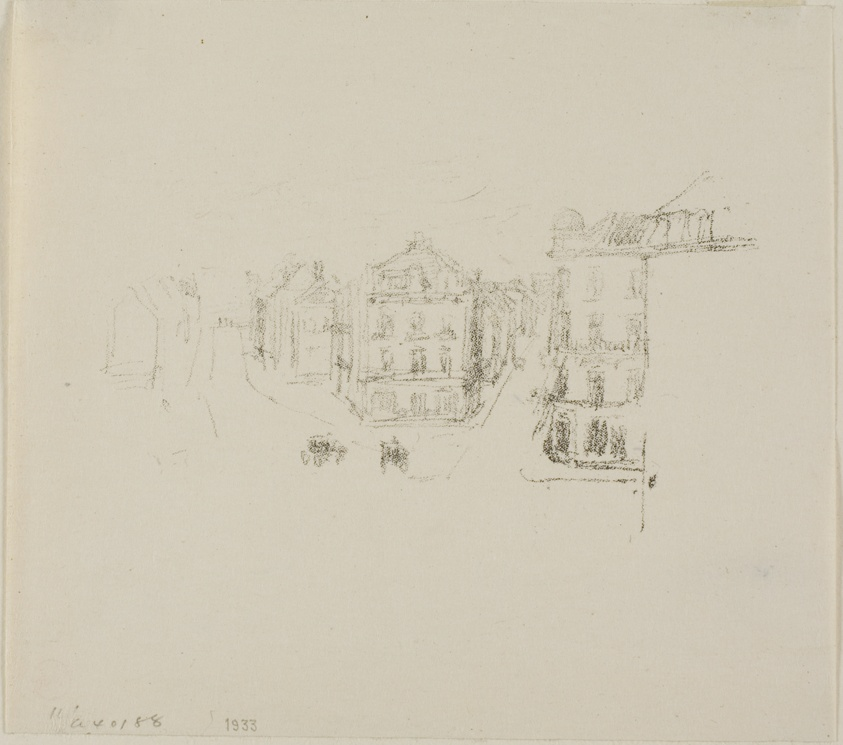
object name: Print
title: Grand Rue, Dieppe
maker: James McNeill Whistler (American, 1834-1903)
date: c. 1891, printed 1904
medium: Transfer lithograph in black on ivory Japanese paper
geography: United States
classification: transfer lithograph; lithograph; print; prints and drawing; paper